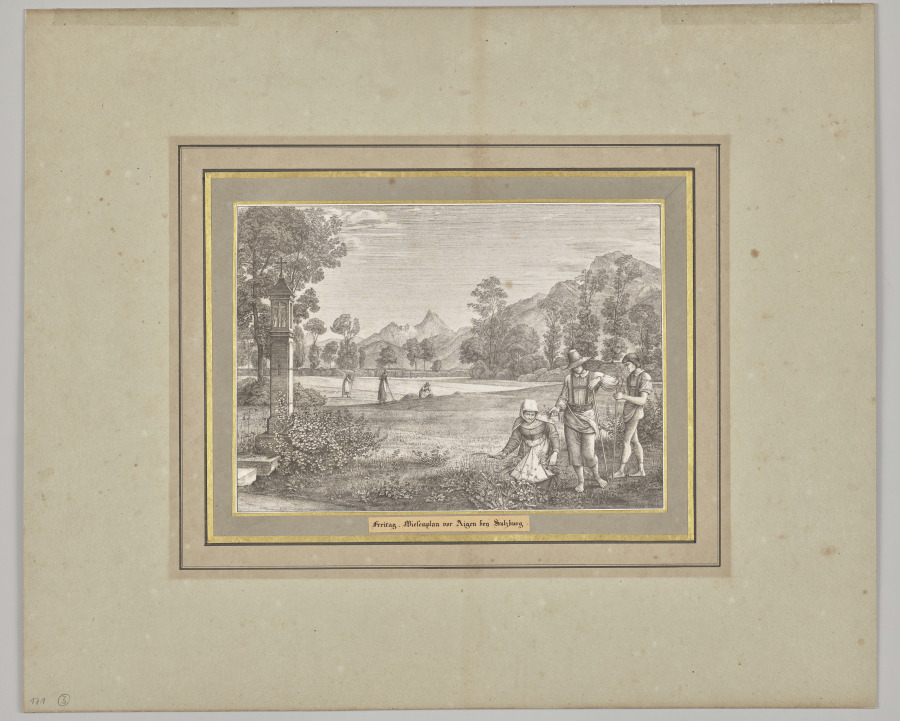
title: Friday. Meadow Plan in Front of Aigen Near Salzburg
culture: Germany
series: Seven Areas from Salzburg and Berchtesgaden. Arranged according to the seven days of the week, connected by two allegorical sheets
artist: Ferdinand Olivier (German, 1785–1841)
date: 1818–23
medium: lithograph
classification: Print